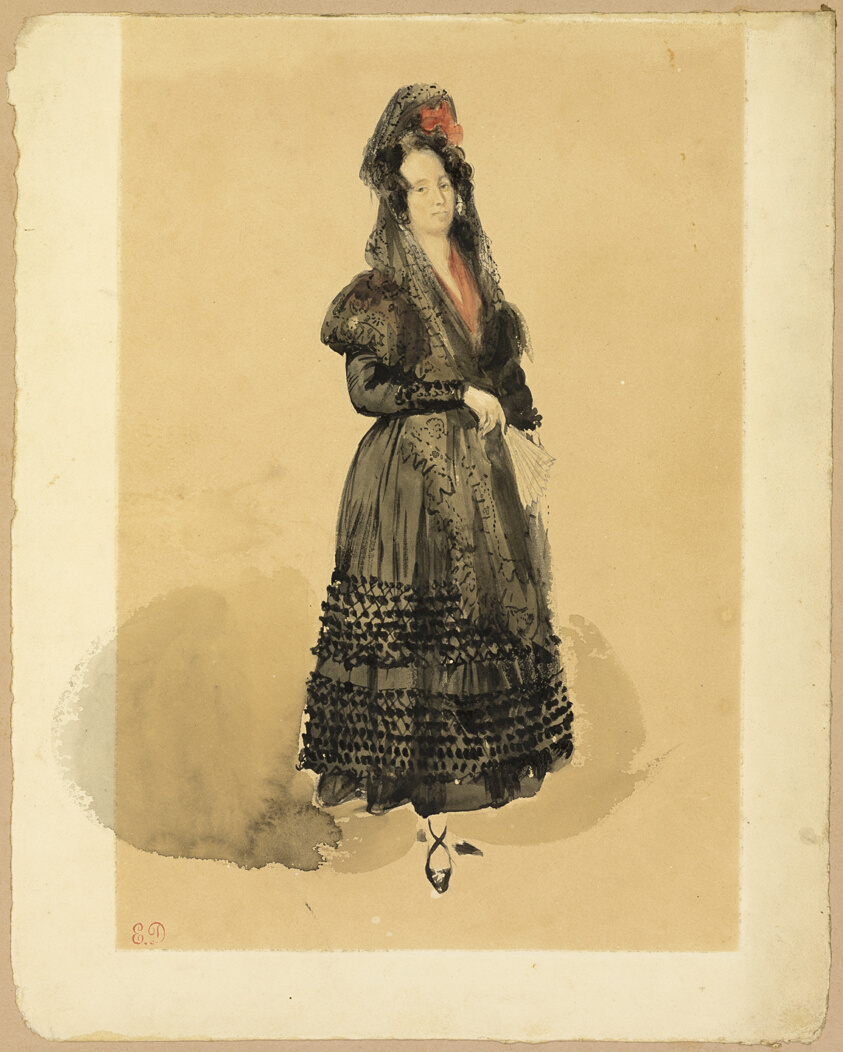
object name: Drawing and Watercolor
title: Young Spanish Lady in Costume of Manola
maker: Eugène Delacroix (French, 1798-1863)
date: 1832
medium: Gouache and watercolor, with traces of scraping, over graphite, on cream wove paper, discolored to tan, perimeter mounted on pale brown wove paper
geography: France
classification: watercolor; drawings (visual works); prints and drawing